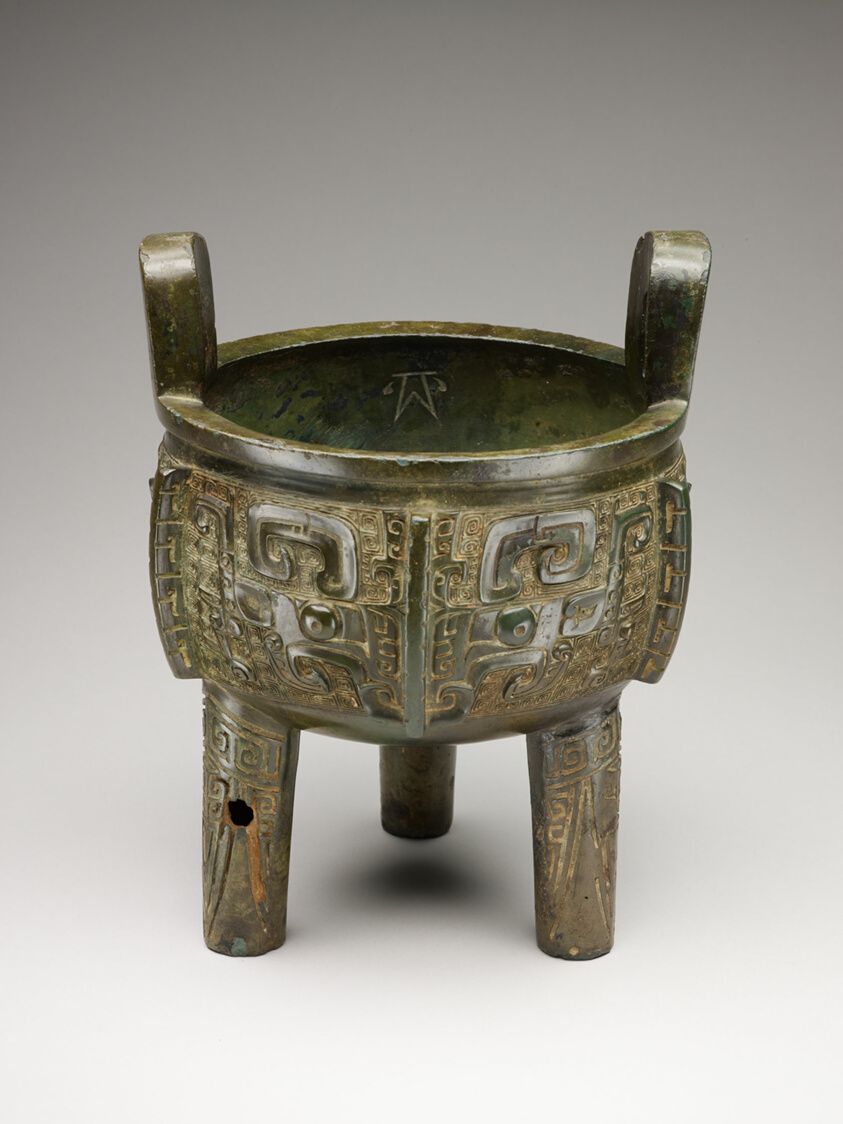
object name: Vessel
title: Tripod Cauldron of Ran (Ran ding)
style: Chinese (culture or style)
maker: China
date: Late Shang dynasty, 13th–11th century B.C.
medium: Bronze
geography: China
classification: bronze; metal; vessel; asian art